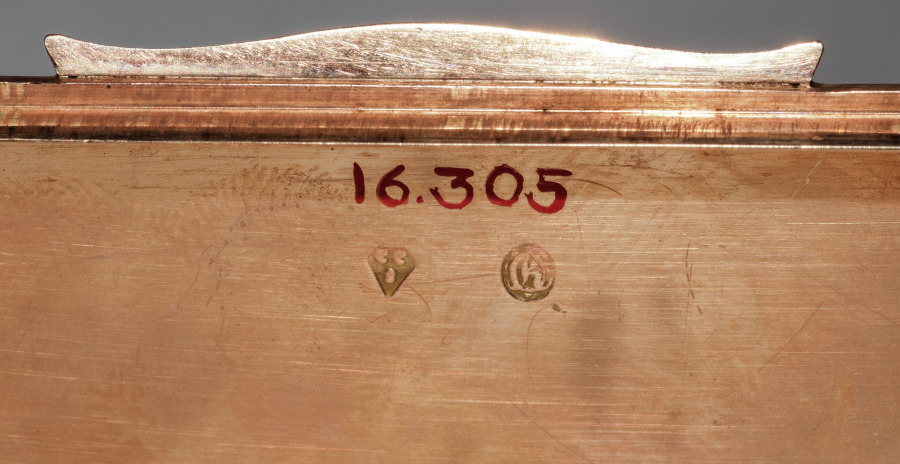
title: Snuff Box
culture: Switzerland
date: c. 1825–1850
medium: gold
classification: Miscellaneous